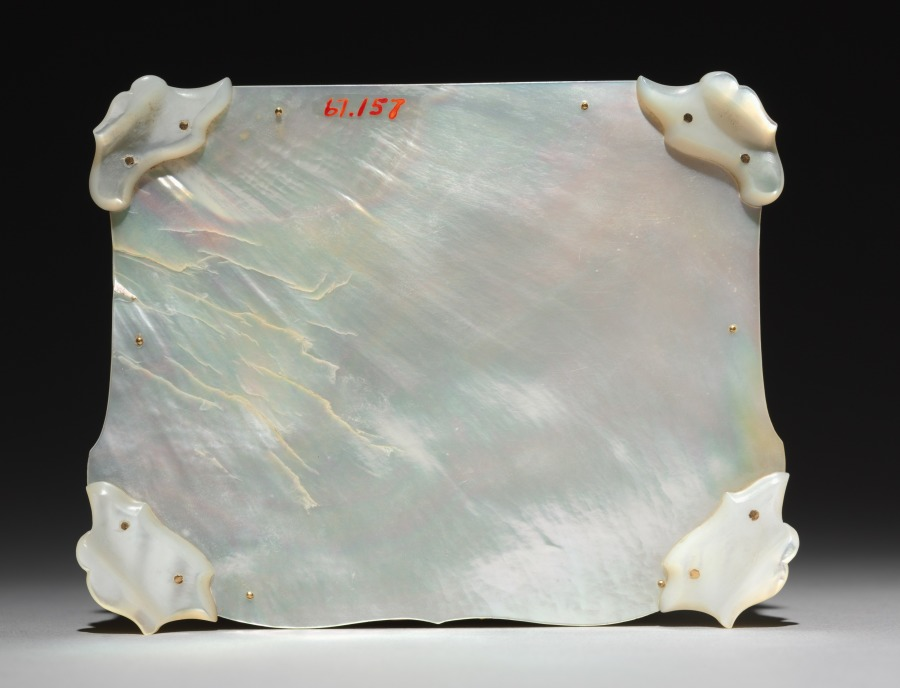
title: Sewing Box with Implements (Nécessaire)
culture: Austria, possibly Vienna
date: c. 1765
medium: gold and mother-of-pearl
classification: Miscellaneous